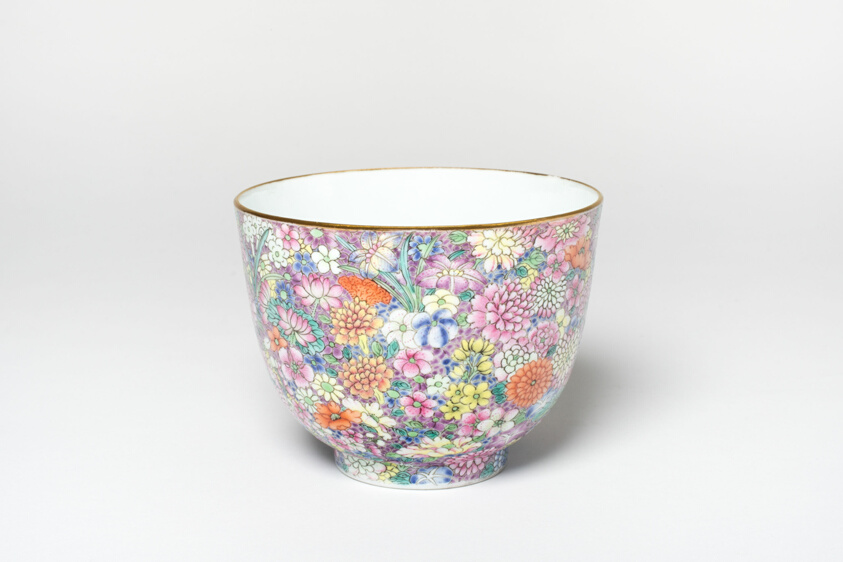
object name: Vessel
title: Mille-Fleurs 'Flower' Bowl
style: Chinese (culture or style)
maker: China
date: Qing dynasty (1644–1911), Jiaqing reign mark and period (1796–1821)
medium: Porcelain with overglaze enamel decoration and metal rim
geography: China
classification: drinking vessel; porcelain; asian art; ceramics; vessel